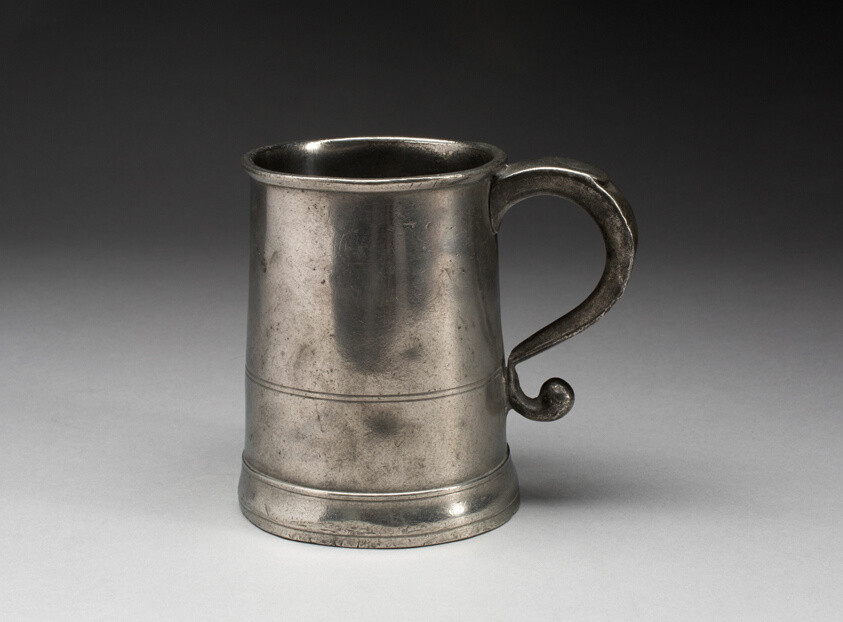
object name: Decorative Arts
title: Tankard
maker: Thomas Danforth Boardman; American, 1784–1873; Sherman Boardman; American, 1787–1861; Hartford, Connecticut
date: 1810–30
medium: Pewter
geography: Hartford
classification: drinking vessel; metalwork; american decorative arts; american arts; decorative arts